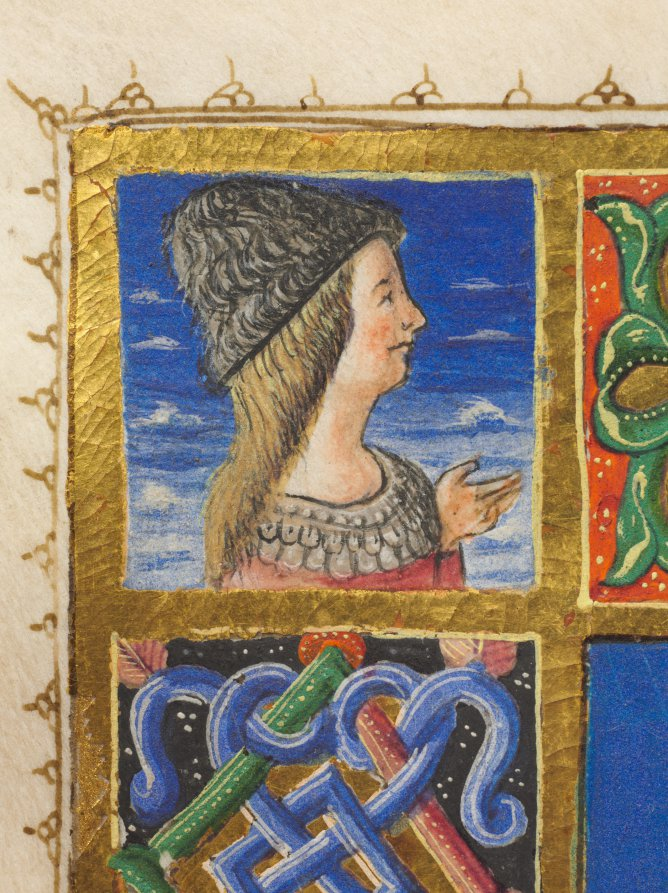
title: Missale: Fol. 185v: Crucifixion with borders (full page)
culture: Italy, Perugia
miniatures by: Bartolommeo Caporali (Italian, c. 1420–1503)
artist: assisted by Giapeco Caporali (Italian, d. 1478)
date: 1469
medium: ink, tempera and burnished gold on vellum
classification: Bound Volume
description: This illuminated manuscript once served as a liturgical service book used on the high altar by a priest for the Mass. The missal’s colophon (inscription) identifies the book as belonging to the church of San Francesco in Montone, a convent of Franciscan friars, and gives its date of completion as October 4, 1469. Here, the volume is opened to its masterpiece, two pages that introduce the canon of the Mass, the most solemn part of the celebration during which the priest consecrates the Eucharistic bread and wine. The missal receives its name from the two Perugian artists who collaborated to illuminate its pages. Here, the Calvary scene featuring the crucified Christ flanked by the Virgin and Saint John is the work of Bartolomeo Caporali, and the marginal decoration and the facing page are likely the work of his brother, Giapeco. Saint Francis’s appearance at the foot of the cross attests to the missal’s Franciscan use and affiliation.